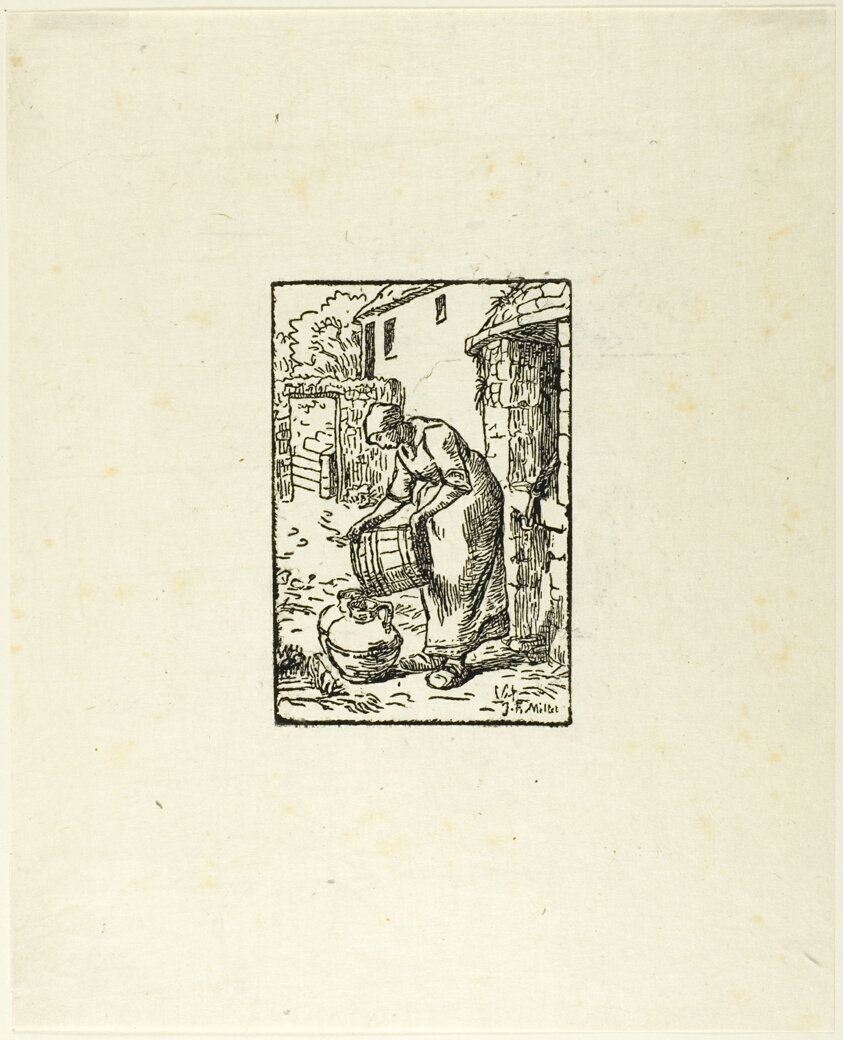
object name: Print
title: Woman Filling Water-Cans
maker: Pierre Millet (French, 1833-1914); after Jean François Millet (French, 1814-1875)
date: 1854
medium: Woodcut on ivory wove Japanese paper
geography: France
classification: woodcut; print; prints and drawing